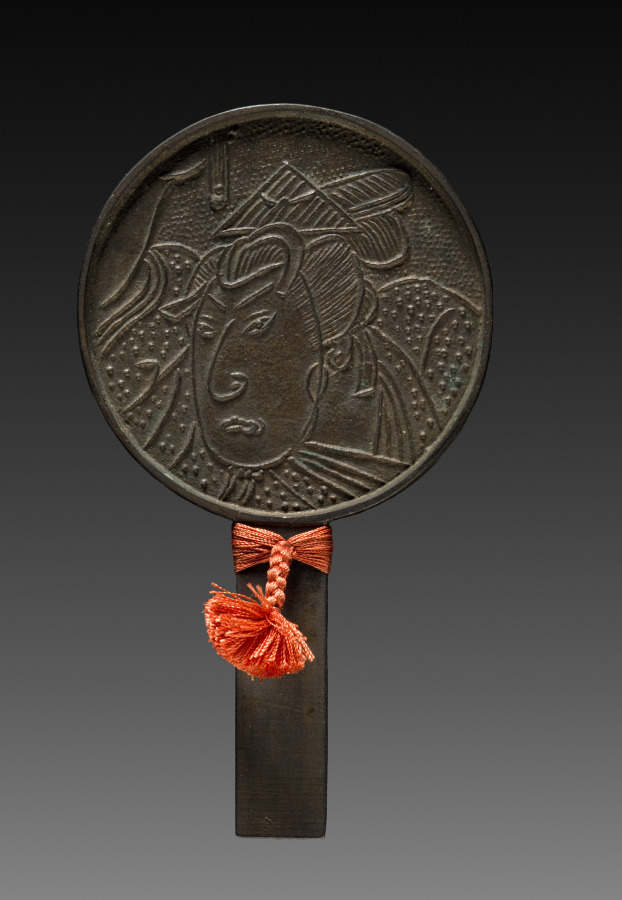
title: Mirror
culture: Japan, Edo period (1615–1868)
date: 1615–1868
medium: bronze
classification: Metalwork